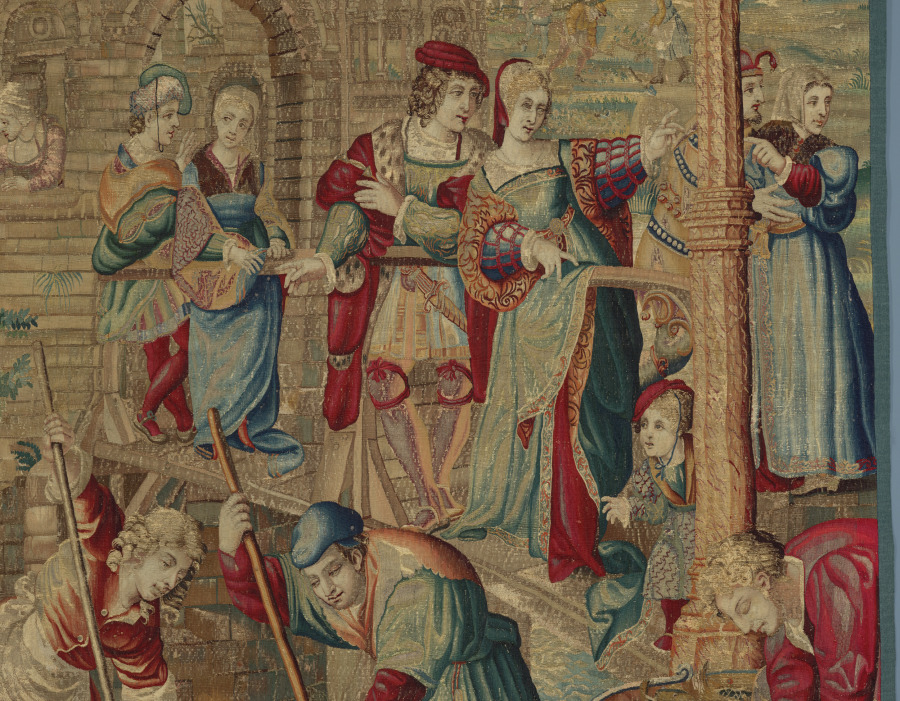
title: Spring: Fishing Scene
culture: France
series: Four Seasons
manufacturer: possibly by Gobelins Manufactory (France, Paris, est. 1662)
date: designed c. 1535, woven mid- to late 1600s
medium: Wool, silk, and gold filé: tapestry weave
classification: Tapestry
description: In this springtime scene, two fishermen wade in a river, dragging a net suspended between two poles. A noble couple on a bridge gestures toward other fishermen, who occupy the other side of this scene in other extant examples of this tapestry with a larger picture plane. In the background, townspeople walk on bridges that lead to the gateway of a town with brick walls and portals. In the far distance, farmers till the soil to sow new seeds, another typical activity associated with spring. The trees on the hills are just beginning to sprout new buds.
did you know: Spring was considered to be a season of courtship and romance; perhaps the gentleman on the bridge in the red cap is trying to catch the attention of the lady next to him.